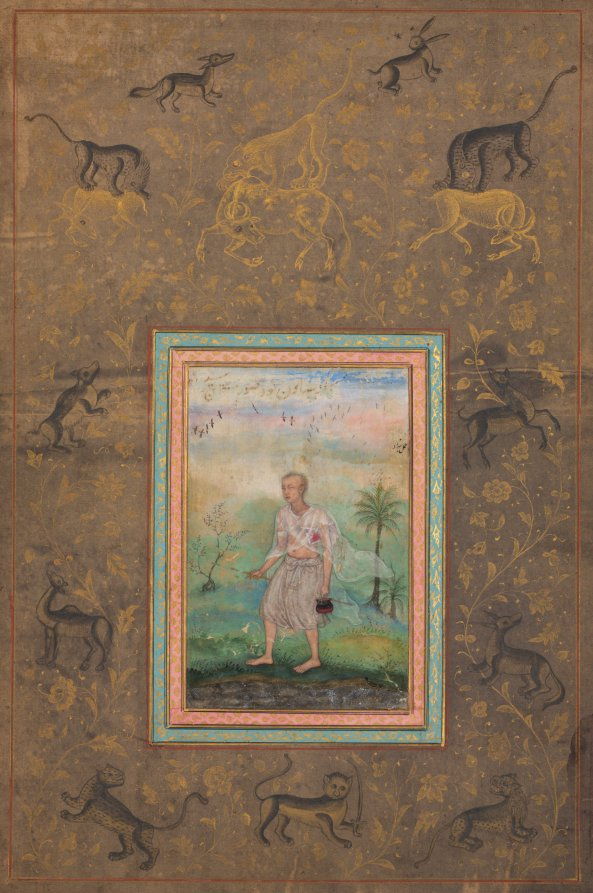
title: Jain Ascetic Walking Along a Riverbank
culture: Mughal India, court of Akbar (reigned 1556–1605)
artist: Basavana (Indian, active c. 1560–1600)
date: c. 1600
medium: gum tempera, ink, and gold on paper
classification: Painting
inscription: amal-i behzad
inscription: amal-i Basawan ... [?]chandra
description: Alluding to his wisdom, this white-clad Jain monk carries a manuscript under his left arm, bound with a red cover. Otherwise he carries a Jain monk’s basic accouterments: whisk broom, staff, and pot. This sensitively painted portrait was made for the collection of the Mughal emperor Akbar who was curious about the tenets of Jainism. He admired the explanations of the Jain monks who regularly attended the emperor’s weekly discussion sessions among members of different religious groups.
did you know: He carries a book and a fly whisk tucked under his left arm.